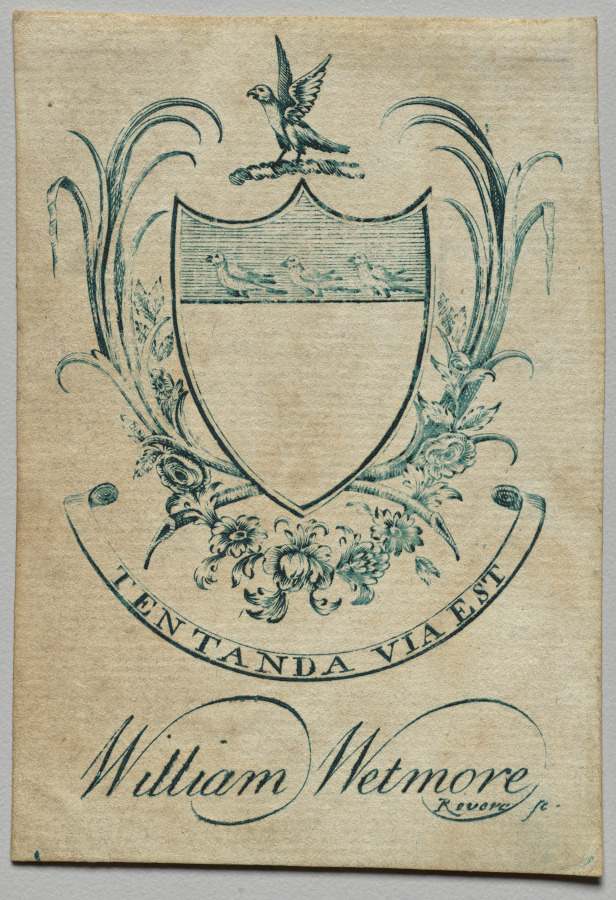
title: Bookplate: Coat of Arms with William Wetmore inscribed below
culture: America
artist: Paul Revere II (American, 1735–1818)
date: c. 1750–1818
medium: engraving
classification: Print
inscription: Signed: "Revere, sc"